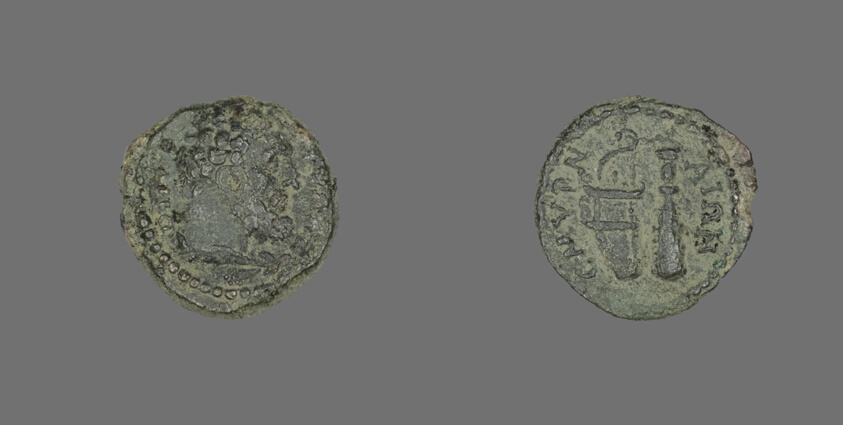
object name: Coin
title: Coin Depicting the Hero Hercules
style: byzantine, european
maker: Roman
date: 138-192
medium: Bronze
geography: Smyrna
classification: coin; ancient art